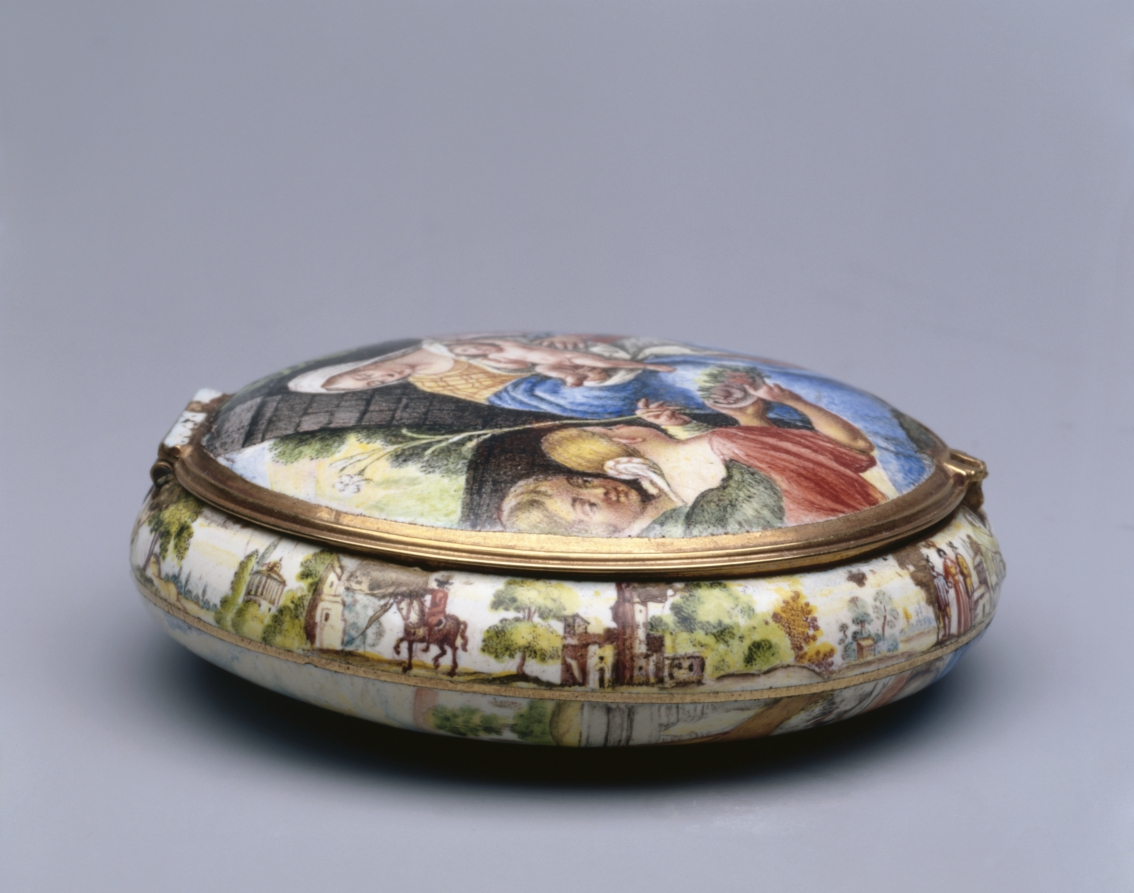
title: Watchcase (Boîtier de montre)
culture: France, 17th century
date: c. 1640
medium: gold and enamel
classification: Jewelry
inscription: [engraved on the rim]: "B8"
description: In the 1630s, the practice of painting with enamel on metal became a means for French miniature painters to achieve a more richly colored, durable product. Previously miniatures were painted with watercolor on vellum, a material made from animal skin. This case would have originally held a watch, but was later transformed into a simple box through the removal of the watch mechanism and ring. This watch case is richly painted inside and out with miniatures modeled after well-known religiously allegorical works.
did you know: Inspiration for the box’s miniatures was drawn from works by Peter Paul Rubens’ The Holy Family with Saints John the Baptist and Elizabeth (1615) (back panel) and Nicolas Cochin (interior base).